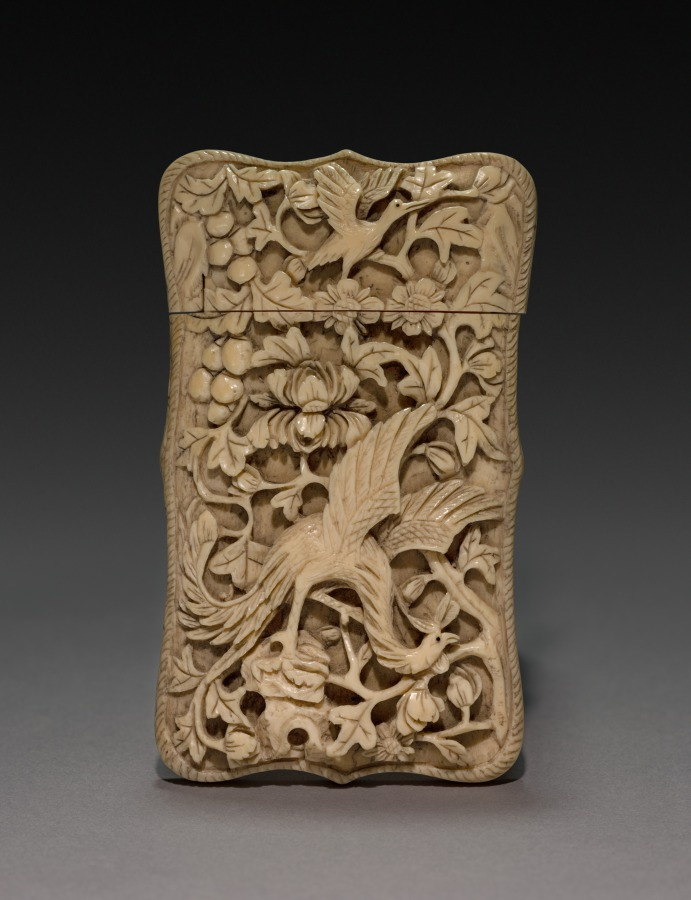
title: Card Case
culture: Japan, Meiji period (1868–1912)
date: early 1900s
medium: ivory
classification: Ivory